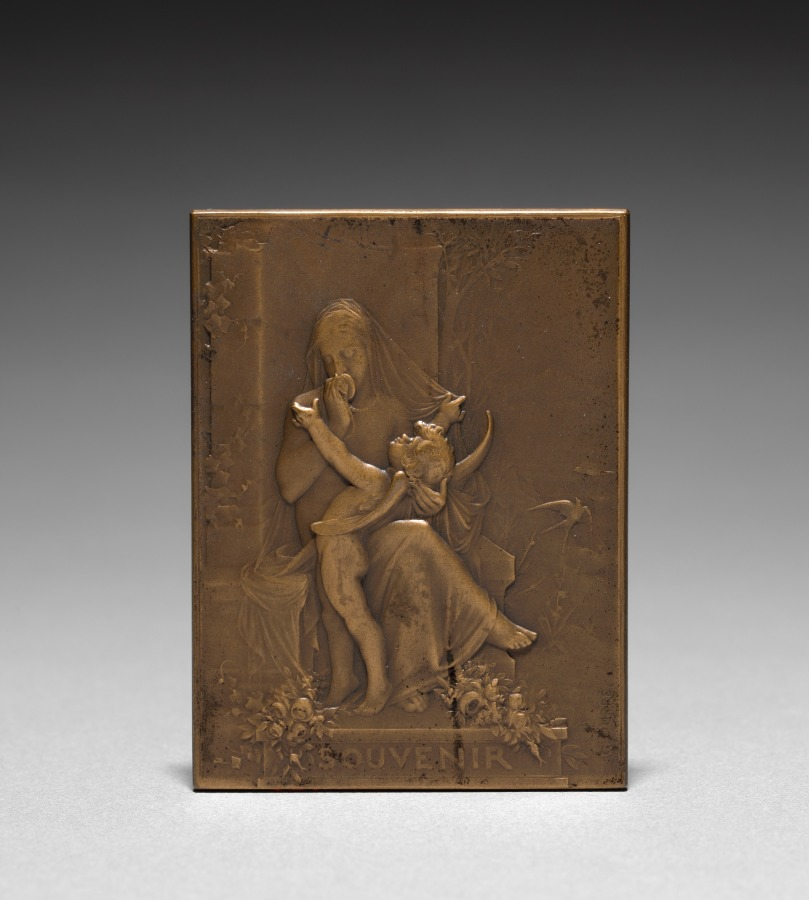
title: Medallion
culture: France, 19th-20th century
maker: Georges Dupré (French, 1869–1909)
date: c.1900–1921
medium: bronze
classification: Plaque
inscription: "Souvenir"; signed: "G. Dupré."